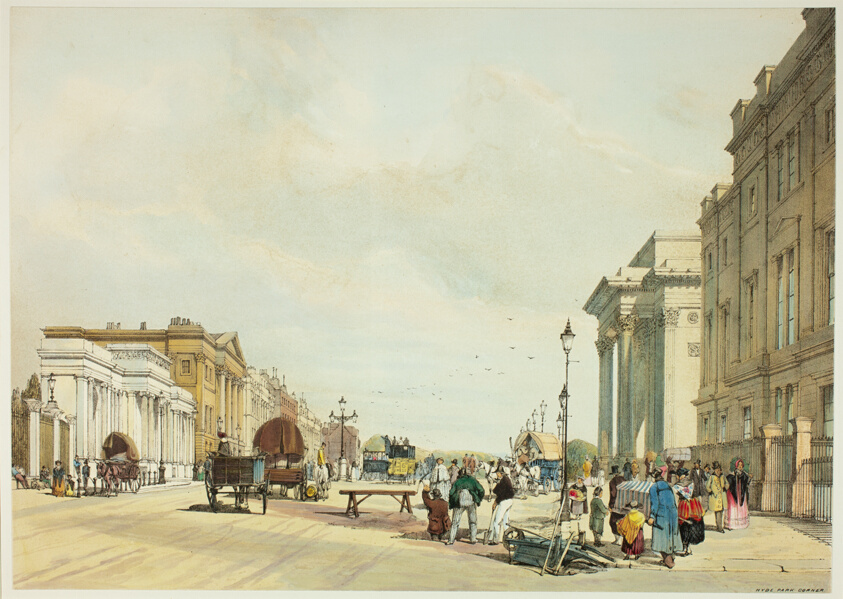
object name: Print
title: Hyde Park Corner, plate fifteen from Original Views of London as It Is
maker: Thomas Shotter Boys (English, 1803-1874); designed by Charles Ollier (English, 1788-1859)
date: 1842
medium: Hand-colored lithograph on paper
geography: England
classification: lithograph; print; prints and drawing